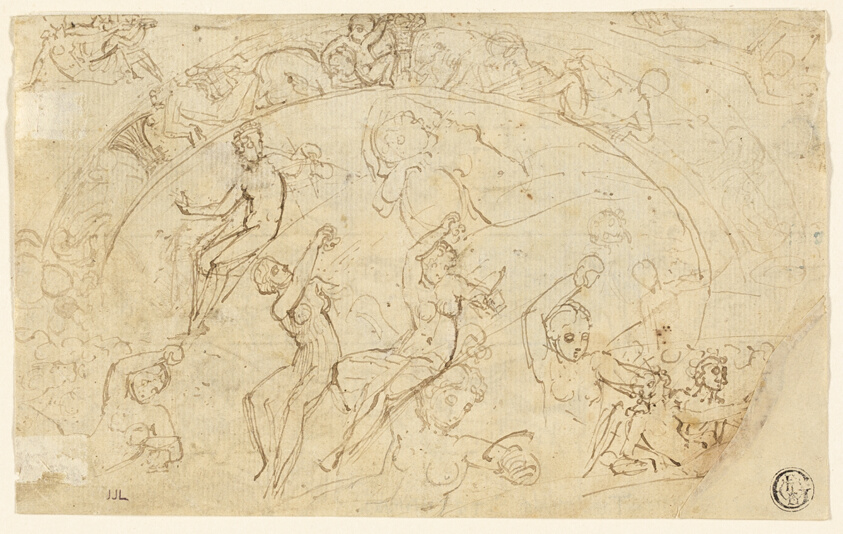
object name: Drawing and Watercolor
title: Sketches for Silver Salver (recto); Sketches of Friezes, Groups of Women (verso)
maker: Recto by Thomas Stothard (English, 1755-1834); Verso possibly by Thomas Stothard (English, 1755-1834)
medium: Pen and brown ink (recto), and pen and brown ink with brush and brown wash and watercolor (verso); on cream wove paper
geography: England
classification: pen and ink drawings; drawings (visual works); prints and drawing